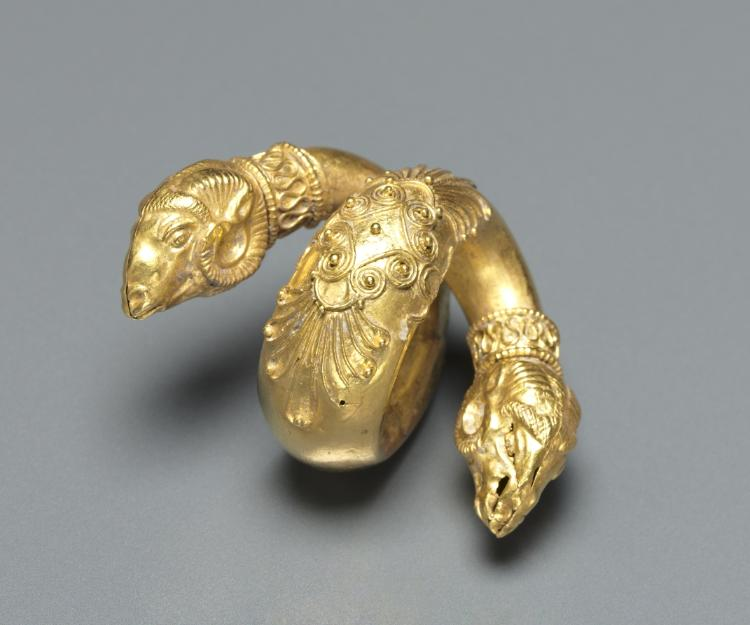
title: Hair Ringlet with Ram Head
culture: Greece, Hellenistic period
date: 400s BCE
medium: gold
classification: Jewelry